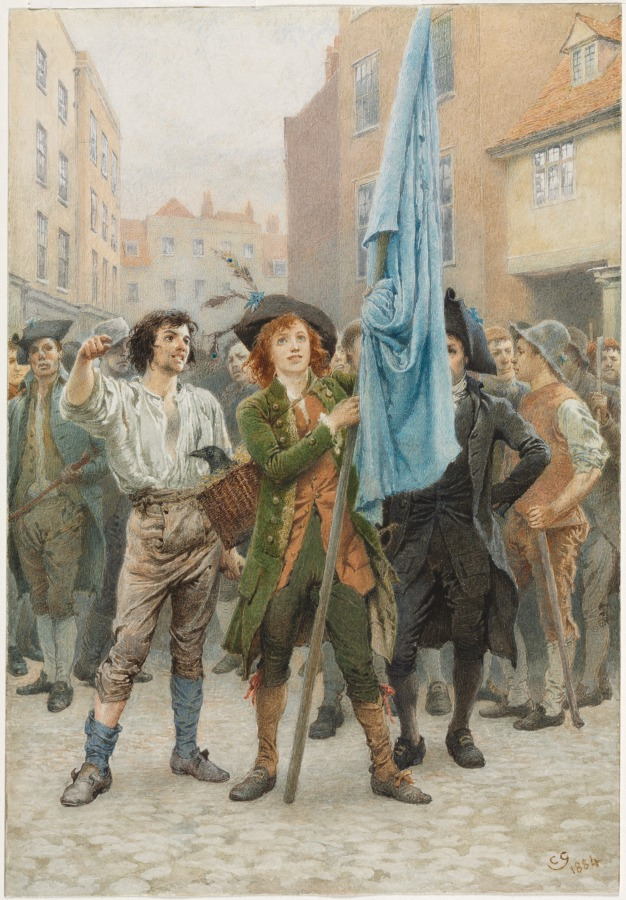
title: Barnaby Rudge Helping Lead the Gordon Riots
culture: England, 19th century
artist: Charles Green (British, 1840–1898)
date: 1884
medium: watercolor with traces of graphite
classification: Drawing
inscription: initialed and dated, in brown ink, at lower right: CG / 1884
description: Charles Green was one of the most successful black-and-white illustrators in Victorian England, known especially for his images related to the novels of Charles Dickens. The subject of this drawing relates to the writer's historical novel Barnaby Rudge: A Tale of the Riots of 'Eighty, based on the Gordon Riots. Here, Green depicted participants in an anti-Catholic protest against the Papists' Act of 1778, the most violent outpouring of religious hatred in 18th-century Britain.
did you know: This drawing was never published as an illustration, but the character of Barnaby appeared in Charles Green's design for a title page for an edition of Dickens's collected works.